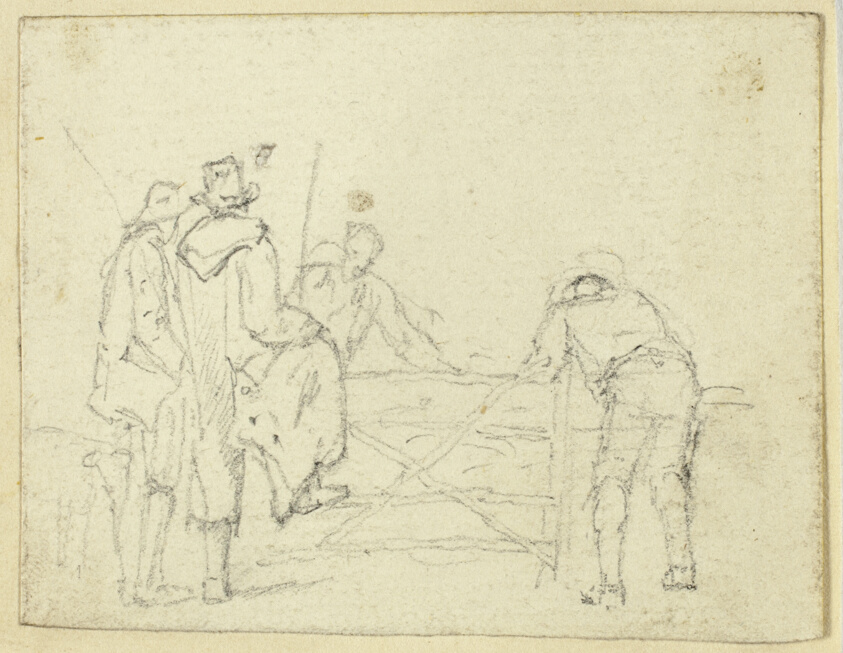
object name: Drawing and Watercolor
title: Five Figures at Gate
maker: William Henry Pyne (English, 1769-1843)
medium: Graphite on cream wove paper, tipped onto cream wove paper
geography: England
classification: graphite; drawings (visual works); prints and drawing